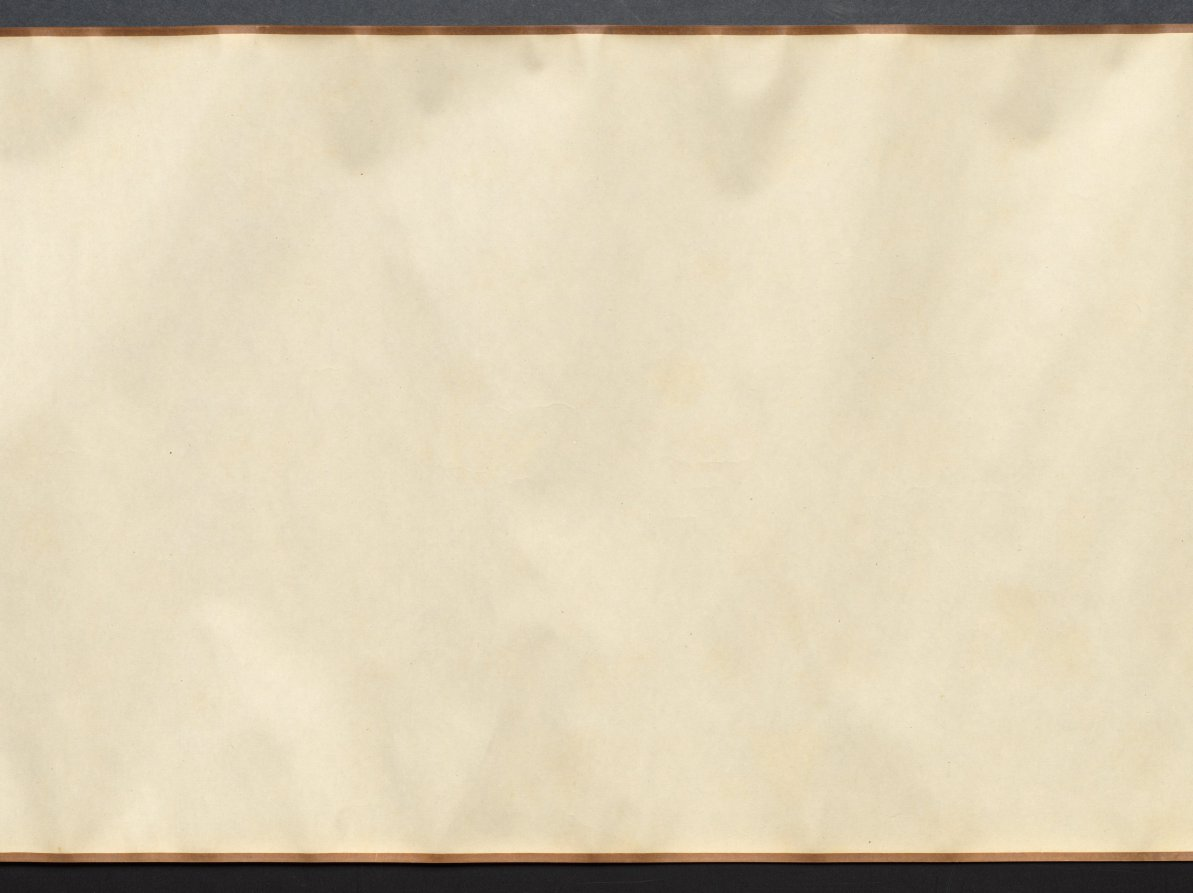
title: Returning to the Village in a Rainstorm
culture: China, Ming dynasty (1368–1644)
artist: Xie Shichen (Chinese, 1487–after 1567)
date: 1530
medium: Handscroll; ink and light color on silk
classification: Painting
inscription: 風雨歸村圖 嘉靖庚寅秋日樗仙謝時臣. [印] 謝時臣印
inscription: 3 additional seals unidentified.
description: This scroll depicts a wind- and rainswept landscape with figures in the countryside struggling against a late summer monsoon rainstorm. Such weather was familiar to residents of the lower Yangzi delta. Xie Shichen spent most of his life in the Suzhou area. Details of his career are scant, but his surviving works suggest that he made his living as a professional painter. This painting conveys drama and anecdotal observations, characteristic of Zhe school paintings, such as the one by Lü Wenying, CMA 1970.76.